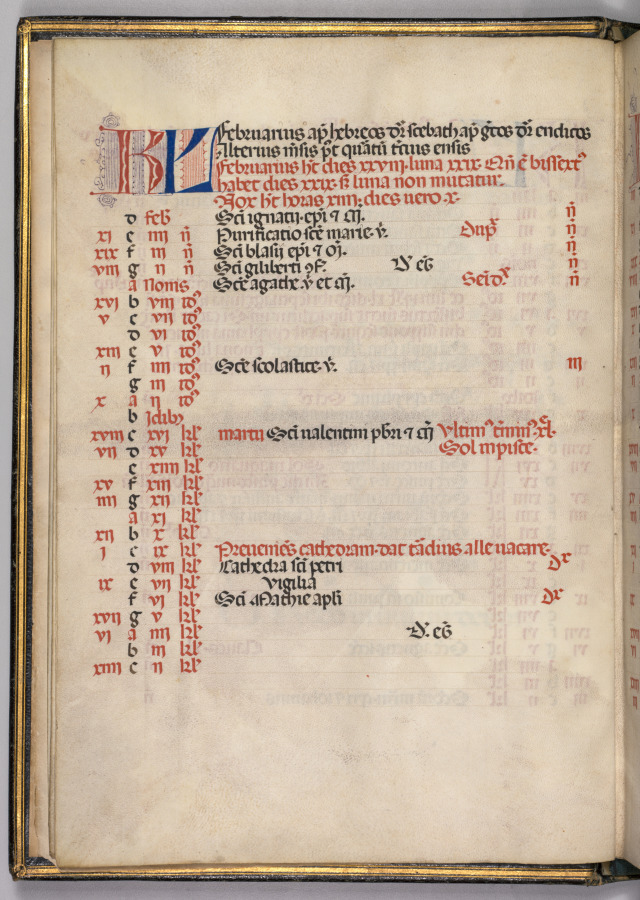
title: Missale: Fol. 3v: February Calendar Page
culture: Italy, Perugia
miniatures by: Bartolommeo Caporali (Italian, c. 1420–1503)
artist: assisted by Giapeco Caporali (Italian, d. 1478)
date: 1469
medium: ink, tempera and burnished gold on vellum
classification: Bound Volume